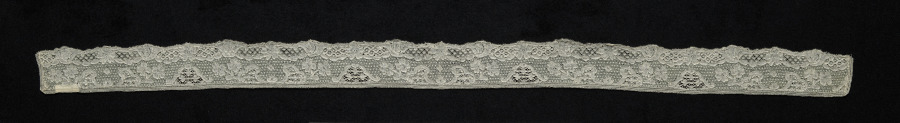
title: Lace Edging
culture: Belgium, Mechelen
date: 1700–1740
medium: Bobbin lace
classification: Lace